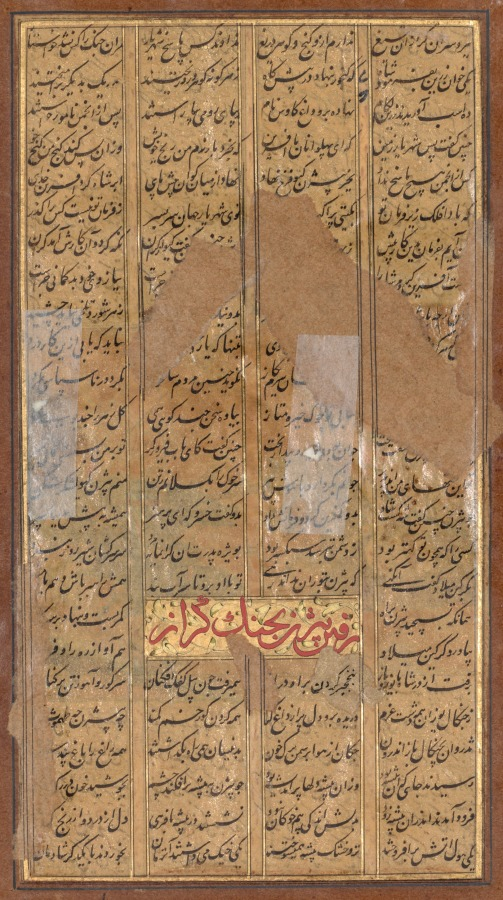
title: Bijan killing the wild boars of Irman, from a Shah-nama (Book of Kings) of Firdausi (Persian, about 934–1020), (recto)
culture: India, Bijapur, Deccan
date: c. 1610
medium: Gum tempera, ink, and gold on paper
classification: Painting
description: This illustrated page from a Shah-nama depicts the first adventure of the hero Bijan, son of an Iranian knight. When reports arrived at the king’s court of wild boars ravaging the borderlands between the enemy realms of Iran and Turan, Bijan volunteered to hunt and kill the beasts, much to the chagrin of his father, who doubted his young son’s ability to navigate the politically volatile situation. The fearless Bijan is shown on horseback as he singlehandedly strikes down on the bodies of the wild boars in the brush. After overzealously celebrating his success, Bijan must be rescued from a pit by Rustam. This early manuscript from the Deccan made for the sultan of Bijapur is characterized by glowing colors and lavish use of gold.